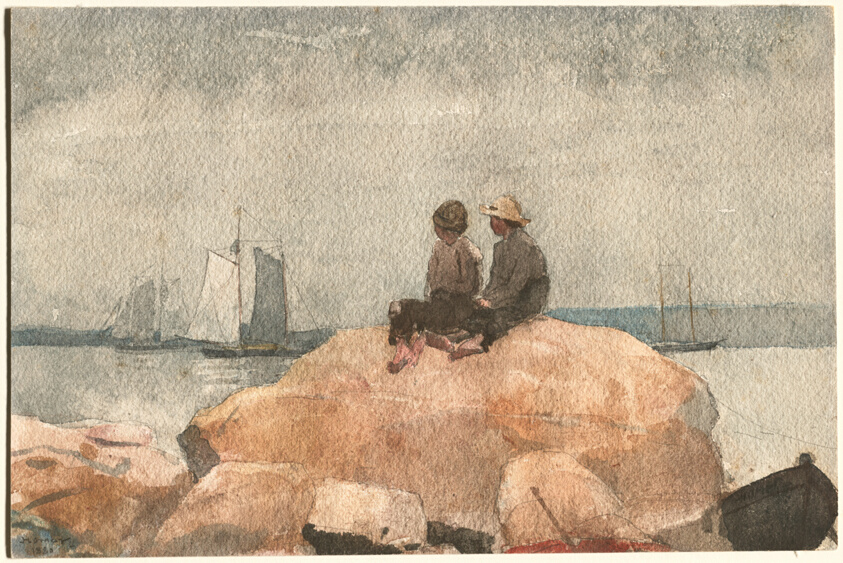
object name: Drawing and Watercolor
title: Two Boys Watching Schooners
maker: Winslow Homer (American, 1836-1910)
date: 1880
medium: Watercolor, with graphite, on moderately thick, rough-textured, ivory wove paper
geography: United States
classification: watercolor; drawings (visual works); prints and drawing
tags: Century of Progress, children, people, boats, world's fairs, Chicago World's Fairs